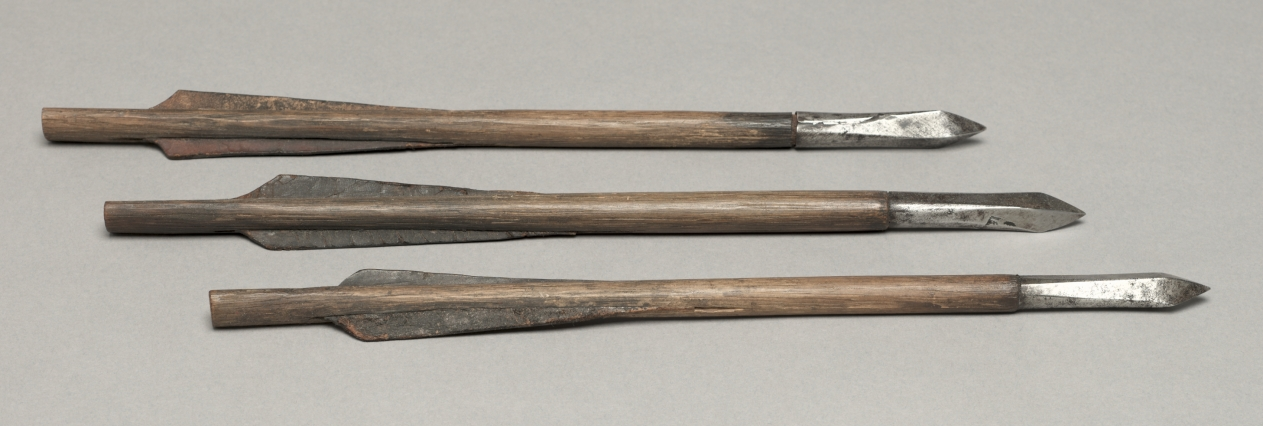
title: Crossbow Bolt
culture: Germany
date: 1500s–1600s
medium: wood, leather, steel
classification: Arms and Armor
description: Also known as a quarrel, crossbow bolts are stockier than arrows, are constructed of durable materials, and can be reused on the field of battle.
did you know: Bolts with leather feathering were used mainly in the Tyrolean area, which includes northern Italy and western Austria.